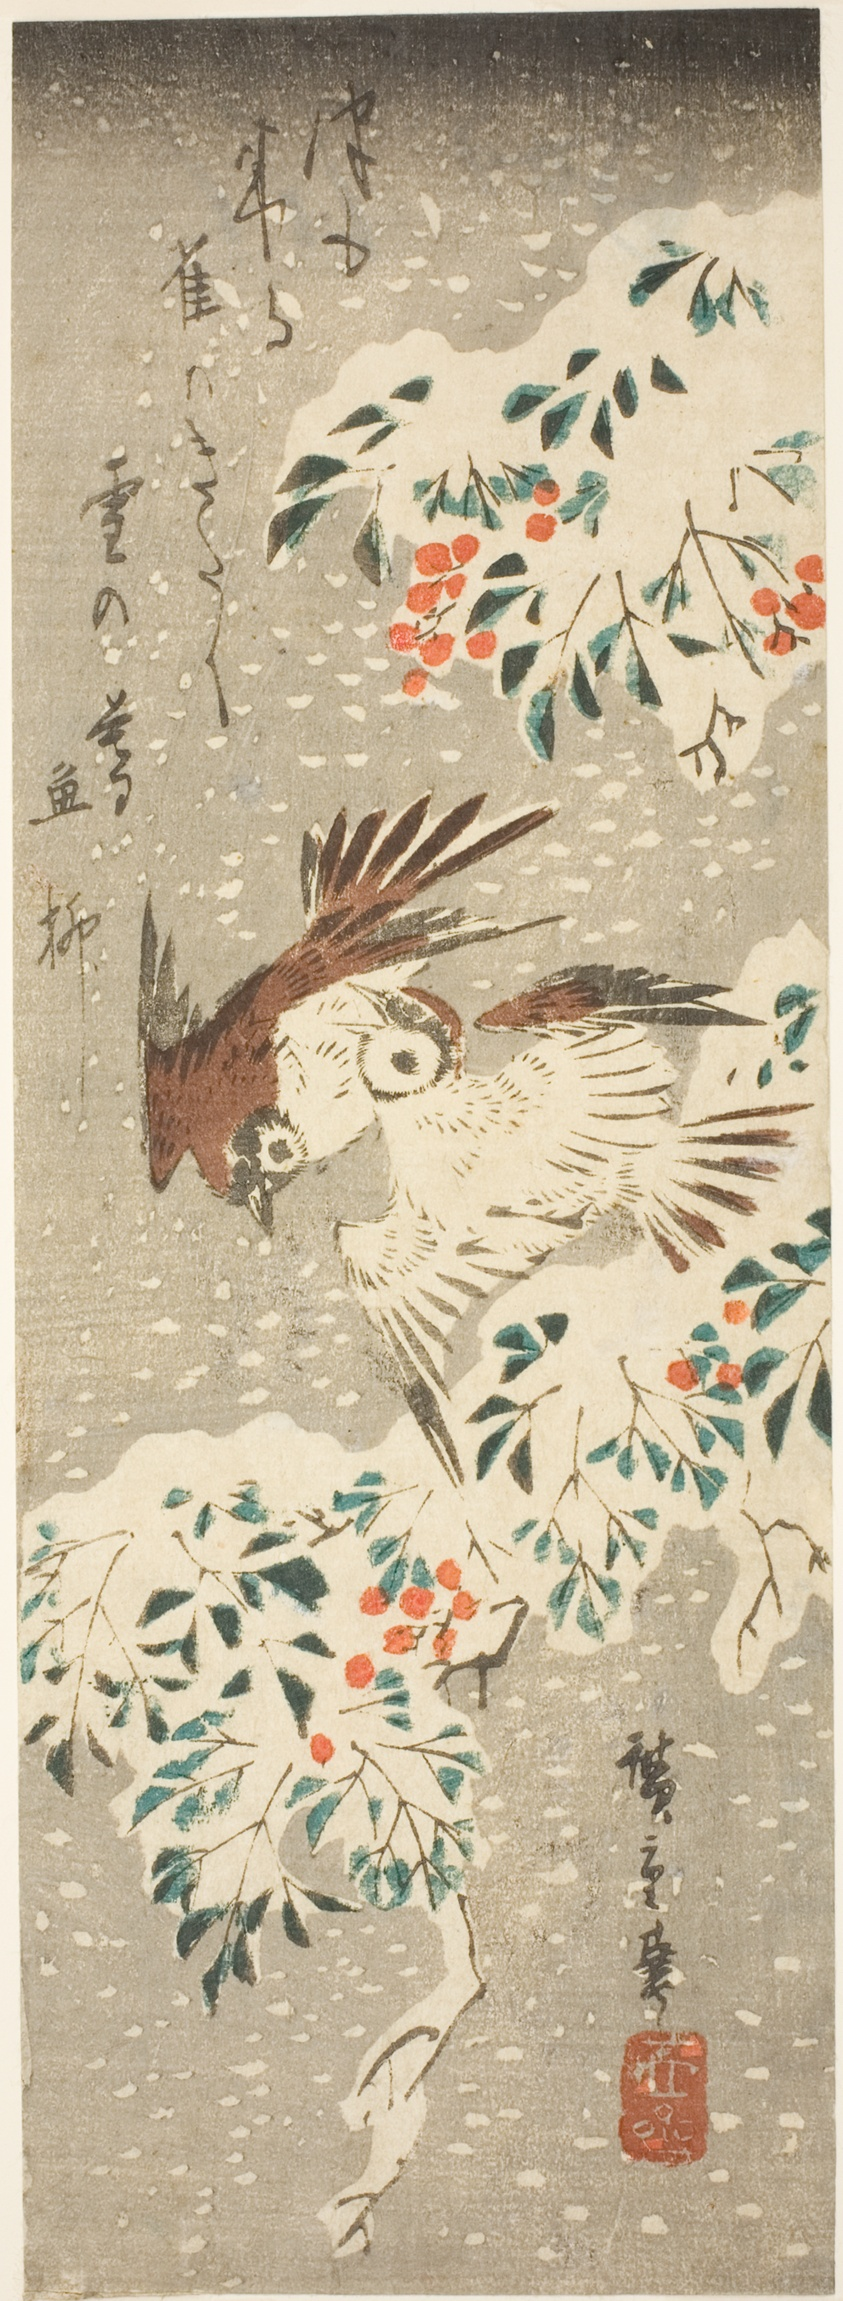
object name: Print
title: Sparrows Flitting about Snow-covered Nandina as More Snow Falls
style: Japanese (culture or style)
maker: Utagawa Hiroshige 歌川 広重; Japanese, 1797–1858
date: c. 1840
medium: Color woodblock print; chu-tanzaku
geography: Japan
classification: woodblock print; print; asian art